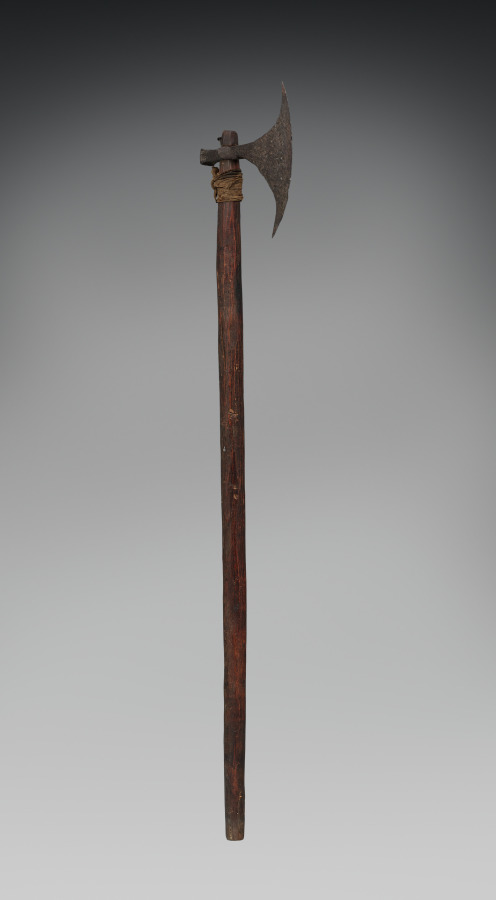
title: Axe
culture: Philippines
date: Before 1922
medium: Blade: metal; handle: wood and natural fibers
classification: Arms and Armor